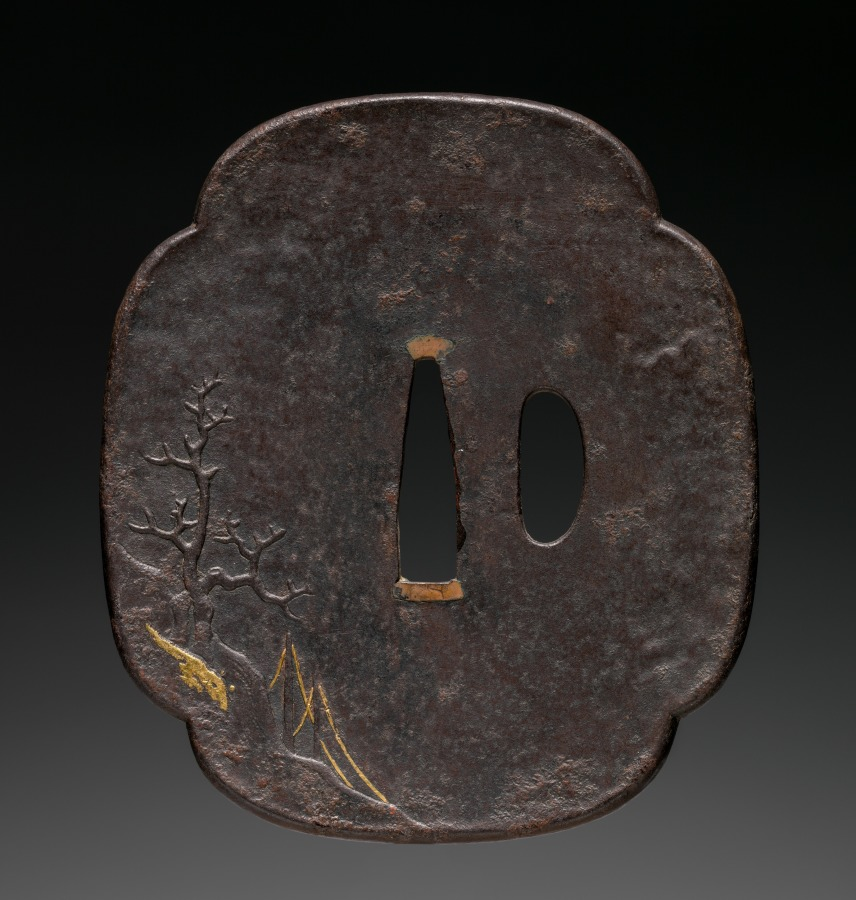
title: Sword Guard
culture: Japan, Edo period (1615–1868)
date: mid-1800s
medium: iron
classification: Arms and Armor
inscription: Signature: Hokuunsai Mitsutomo